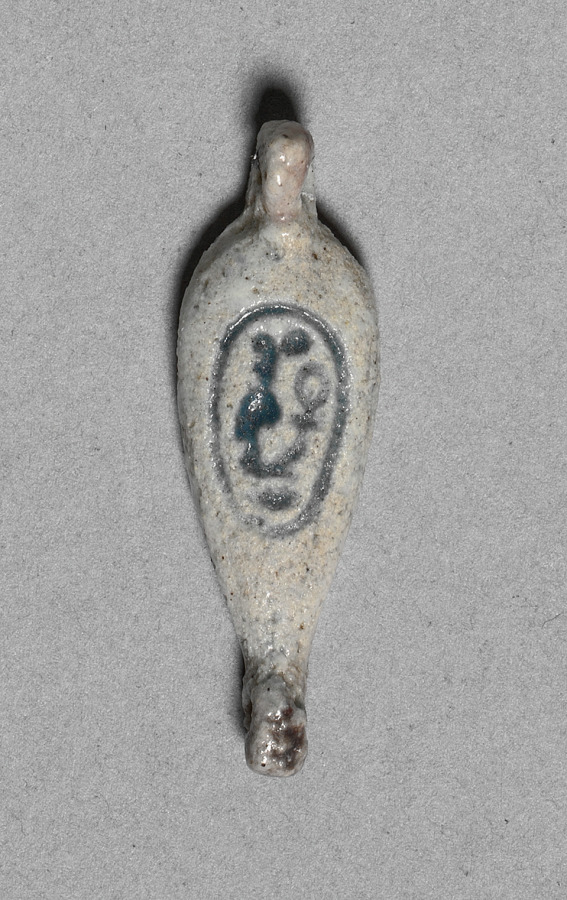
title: Petal-Shaped Bead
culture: Egypt, New Kingdom (1540–1069 BCE), Dynasty 18, reign of Amenhotep III (1390–1352 BCE)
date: c. 1391–1353 BCE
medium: faience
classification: Jewelry